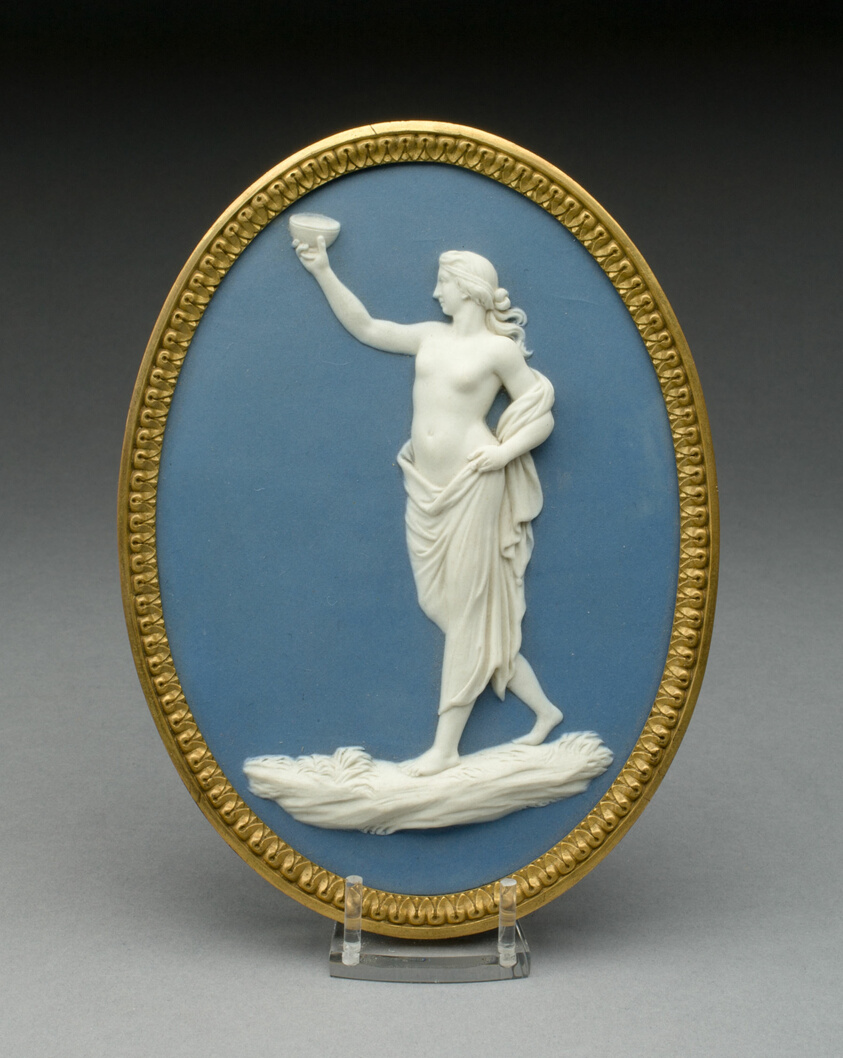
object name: Ceramics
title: Plaque with Bacchanalian Figure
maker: Wedgwood Manufactory (England, founded 1759)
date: 1769/80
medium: Stoneware (jasperware)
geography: Burslem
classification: sculpture; stoneware; european decorative arts; ceramics